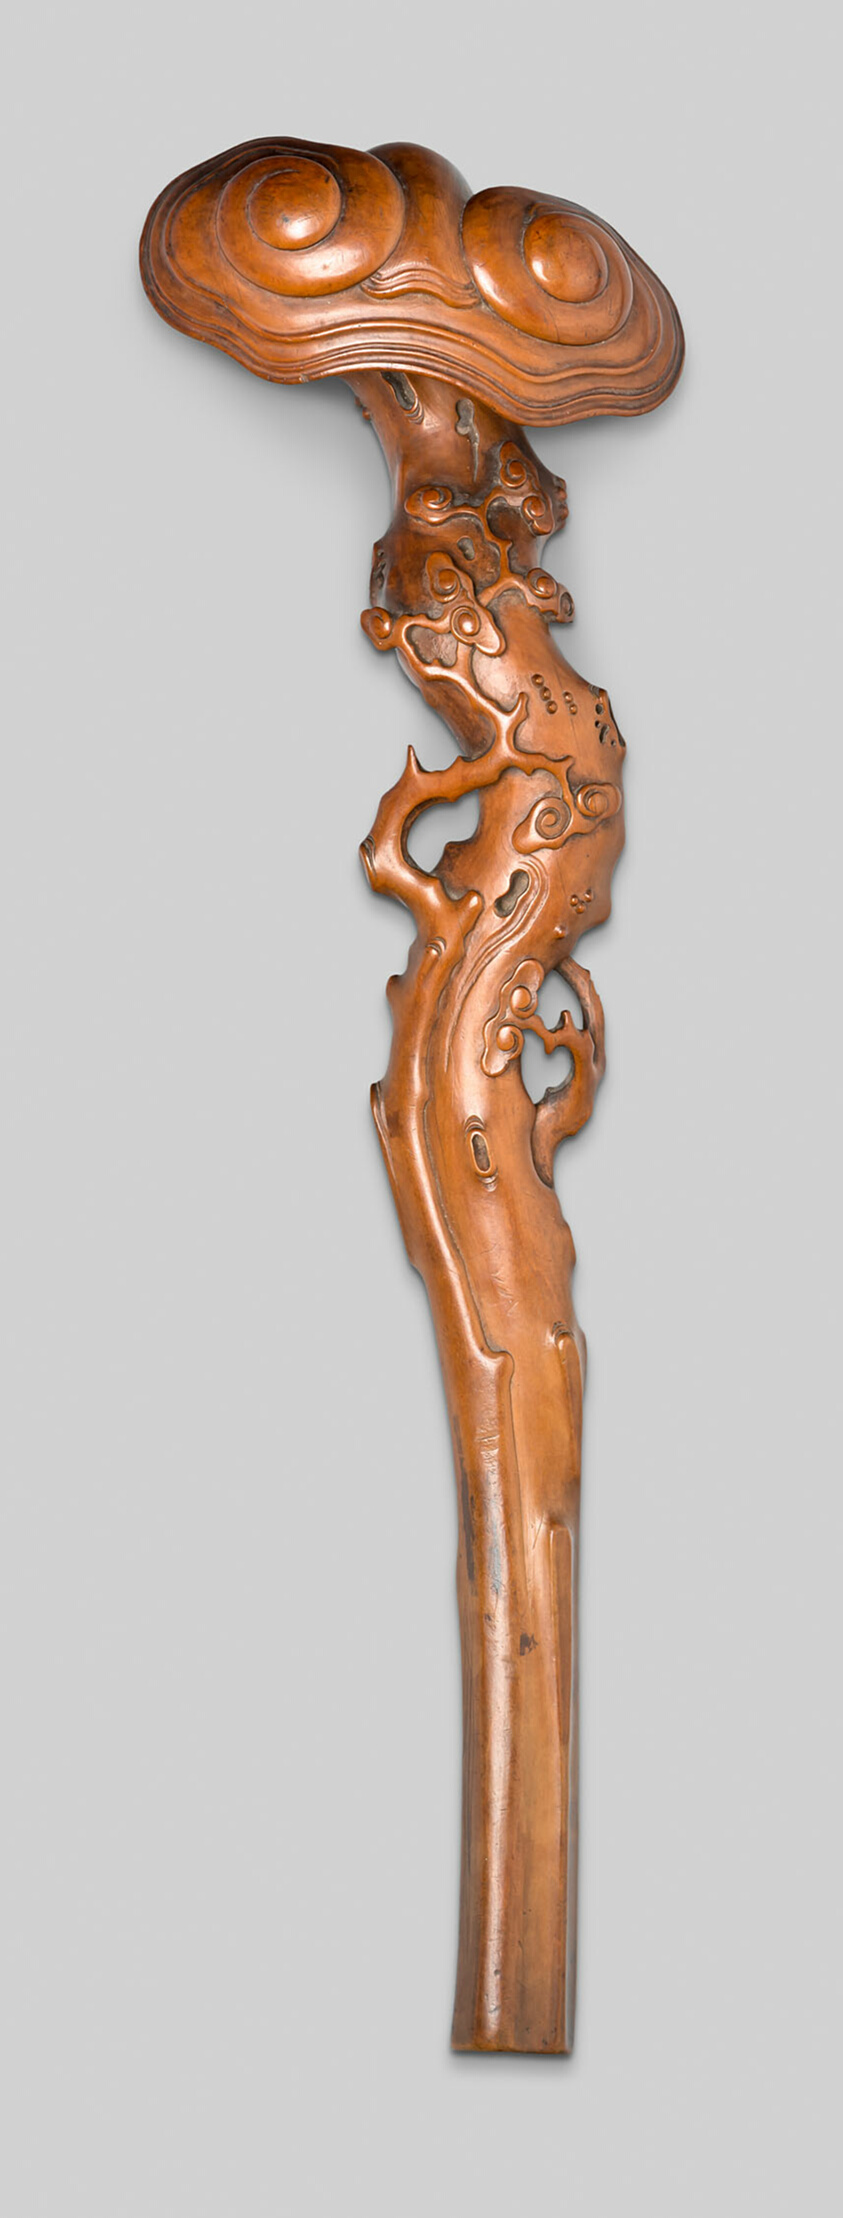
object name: Decorative Arts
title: Scepter with Head in Form of a Double Cloud (Ruyi)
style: Chinese (culture or style), qing, 19th century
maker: China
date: Qing dynasty (1644–1911), 19th century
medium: Boxwood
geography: China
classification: ceremonial object; decorative arts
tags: clouds